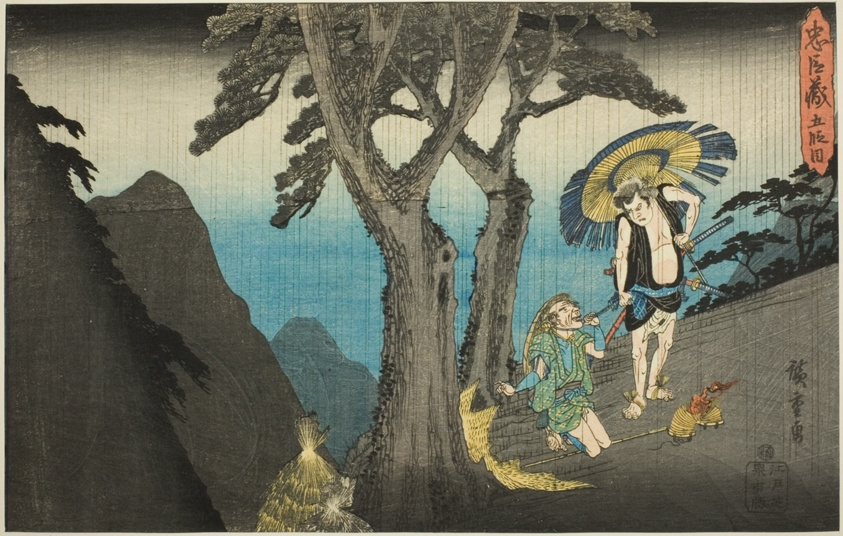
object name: Print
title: Act 5 (Godanme), from the series "The Revenge of the Loyal Retainers (Chushingura)"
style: Japanese (culture or style)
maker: Utagawa Hiroshige 歌川 広重; Japanese, 1797-1858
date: c. 1834/39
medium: Color woodblock print; oban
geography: Japan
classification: woodblock print; print; asian art